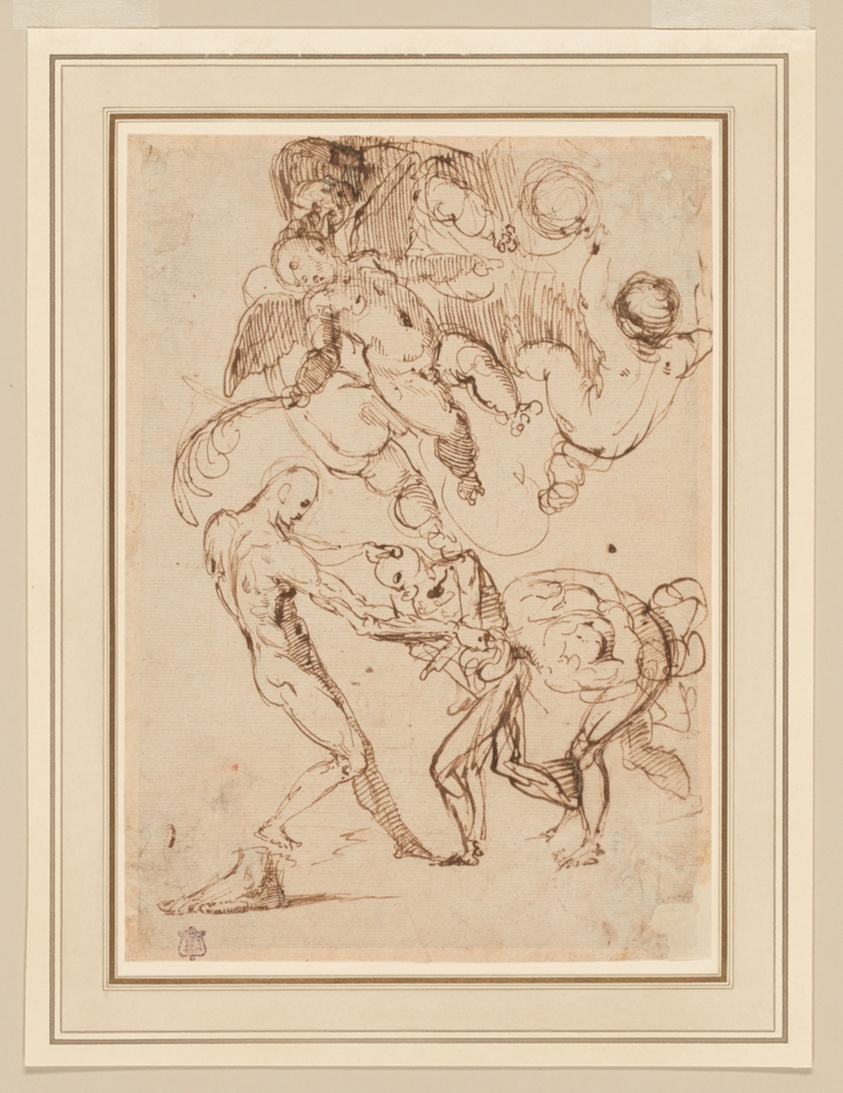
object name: Drawing and Watercolor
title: A Study of Bound Male Figures being Manhandled, and Various Putti, One Holding a Palm Frond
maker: Unknown artist; Italian, late 16th/early 17th century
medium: Pen and brown iron-gall ink on cream laid paper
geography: Italy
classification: drawings (visual works); paper; prints and drawing